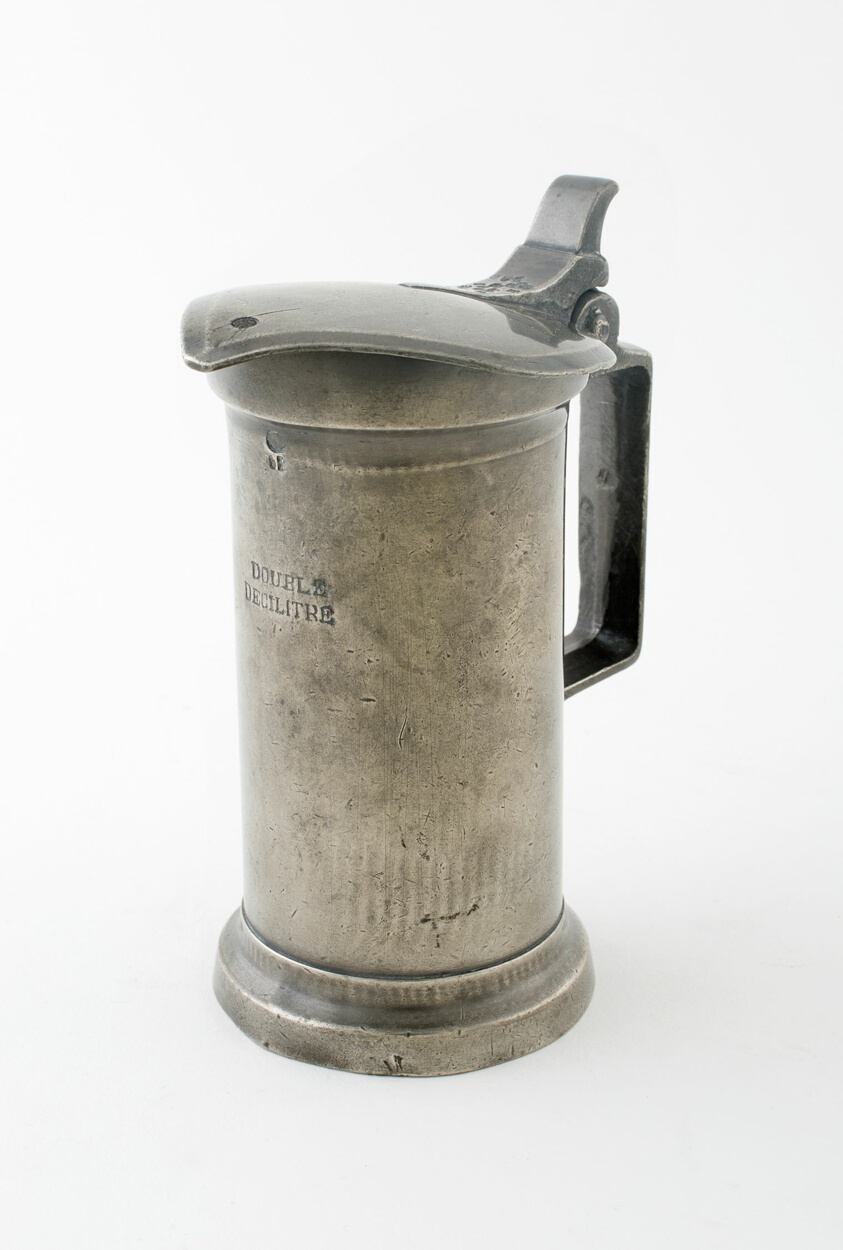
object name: Metalwork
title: Double Decilitre Measure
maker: Maison Le Seigneur; Deverre; Caen, France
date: 1875/1895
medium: Pewter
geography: Caen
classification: pewter; metalwork; european decorative arts